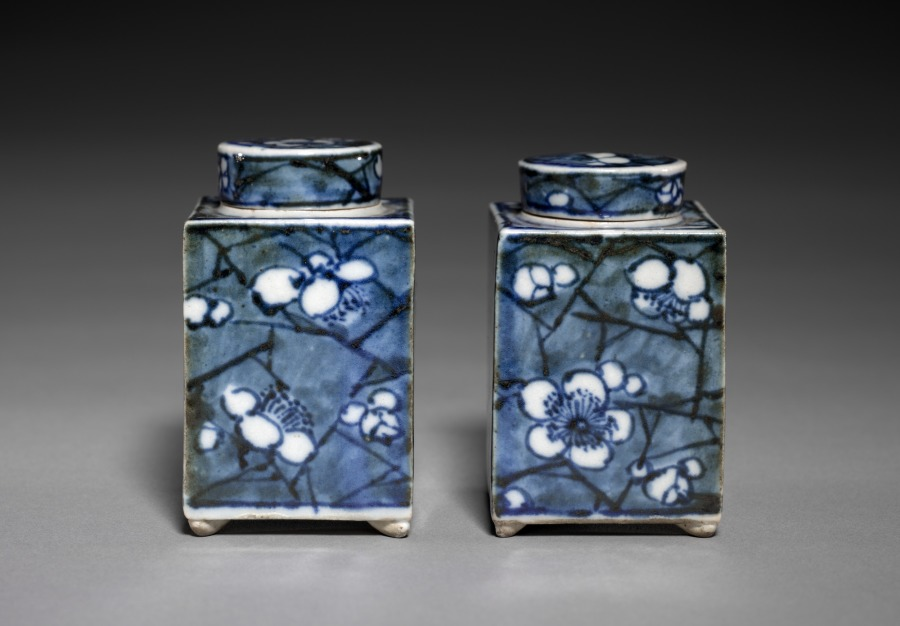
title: Pair of Tea Containers with Plum Blossoms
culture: Japan, Edo period (1615–1868)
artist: Aoki Mokubei (Japanese, 1767–1833)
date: early 1800s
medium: porcelain with underglaze blue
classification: Ceramic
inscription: signed "Ro Mokubei" on base in underglaze blue.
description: Aoki Mokubei, born into a family of restaurateurs, was a potter, calligrapher, painter, and scholar, and is considered one of the three masters of later Edo period Kyoto ceramics. He specialized in porcelains fashioned after Chinese prototypes, and created works for steeped tea (sencha) such as these matching tea caddies decorated in an underglaze blue called sometsuke—literally “with applied dye.” He signed them on their bottoms. They also have intricately patterned silk sleeves to both beautify and protect them. On the exterior of the lid of the outer wooden box that contains them, it is written that Mokubei inscribed and painted an image on the box. On the interior of the lid, the signature and seals of a former owner are written. Mokubei has signed the lid of the inner box, and a charming ink and light color composition of West Lake in Hangzhou in China covers its three sides. On the fourth side is a long inscription by Mokubei describing the scene.